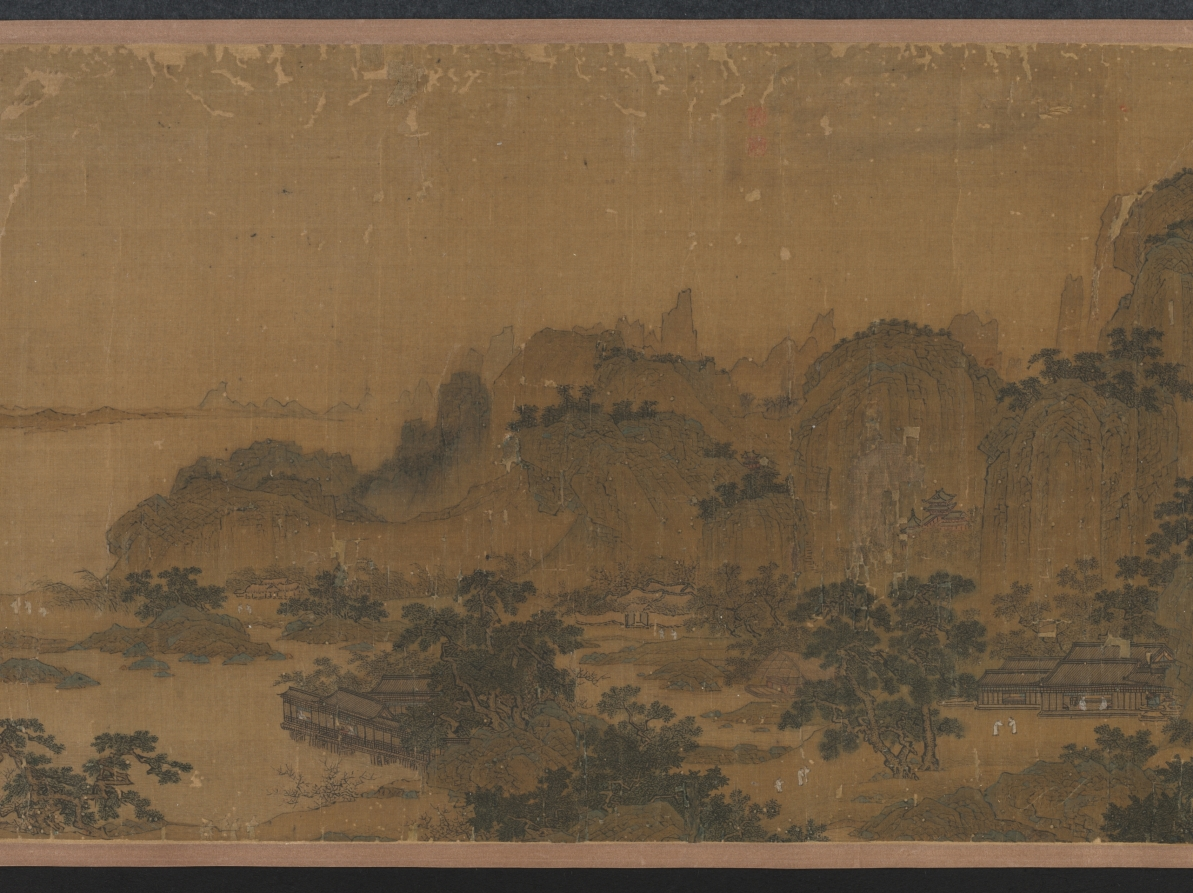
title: Waiting for the Moon in the Mid Autumn Festival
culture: China, Ming dynasty (1368–1644)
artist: Shi Rui (Chinese, c. 1400-c. 1470)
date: 1400s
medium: handscroll, ink, color, and gold on silk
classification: Painting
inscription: [印] 石氏以明; 游戯翰墨.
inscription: 僊山樓觀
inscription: 1 inscription, dated 1639, and 1 seal of Xiao Yuncong 蕭雲従 (1596-1673). Inscription by Xiao Yuncong: This is a painting by the Junior General Li. The painting is damaged and cracked at many places. Many of the paper strips for backing have been missing since long ago, but the colors are still fresh as if they had just been applied and the ink still looks moist. During the reign of Tianbao (742-756) of the Tang Dynasty, the Imperial Klansman Li Sixun was summoned to paint the walls of the Datong Hall. He was known as the "Senior General." His son, who came to be known as the "Junior General," was named Zhaodao. Of the stone epitaph [Li Sixun bei, or the "epitaph of Li Sixun," one of the best known calligraphic monuments of the Tang Dynasty], engraved with the calligraphy of Li Beihai 李北海 [Li Yong 李邕, 678-747], more than half has fallen off. Why, in contrast, was this painting able to survive? Or could it be that despite the fact that the stone is hard and the silk is soft, their preservation or destruction depends on some other factors? Moreover, since they were titled nobility of imperial descent, it is doubtful that they had the leisure and the mood to indulge in such decorative and descriptive blue and gold painting for the mere amusement of their fellow men. Recently, I read the Yi zhou ming hua lu 益州名畫錄 [by Huang Xiufu 黃休復, preface 1005]. I found a certain Li Chin-nu who compared himself with Li Zhaodao 李昭道 and was called by the Sichuan people the Junior General Li. In a painting which he did, entitled Mt. Ch'ing-ch'eng, the architectural structure of the pavilions, terraces, bridges, and boats are meticulous and accurate. The horsemen on a spring outing are as small as grain and the wild geese among the clouds as tiny as dust. It was also said that he painted on silk of any length in accordance to specific commissions. Is it possible that this painting is one of his? Since that time 700 years have passed. Yet one of the two Junior General Li's must be our painter. Formerly, there were the so-called "Four Excellents" in the Hall of Portraits of the Buddhist monk Wu-ta Kuo-shih: the [portrait] painting by Ch'ang Ts'an [act. ca. 881-888}, the calligraphy by Priest Tao-ying, the eulogy by Li Shangyin 李商隱 [813-858], and the landscape by Li Sheng [act. ca. 908-925]. This Li Sheng was styled Chin-nu and was also called Junior General Li. In the tenth month of the Chi-mao year, the twelfth year of the Chongzhen era [1639], recorded by Xiao Yuncong of Wuhu. trans. WKH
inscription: 4 colophons and 30 additional seals: 1 seal of Xu Qianxue 徐乾學 (1631-1694); 1 seal of Li Chien 黎簡 (1747-1799); 1 seal of Chang Chin-fang (18th c.); 2 seals of Sun Erzhun 孫爾準 (1770–1832); 1 colophon and 2 seals of Zhang Weiping 張維屛 (1780-1859); 1 seal of Wu Rongguang 吳榮光 (1773-1843); 1 colophon and 2 seals of Luo Tianchi 羅天池 (1826 jinshi); 7 seals of Wu Yanhui 伍元蕙 (active 1821–1851); 2 colophons and 4 seals of Pan Zhengwei 潘正煒 (1791-1850); 9 seals unidentified.